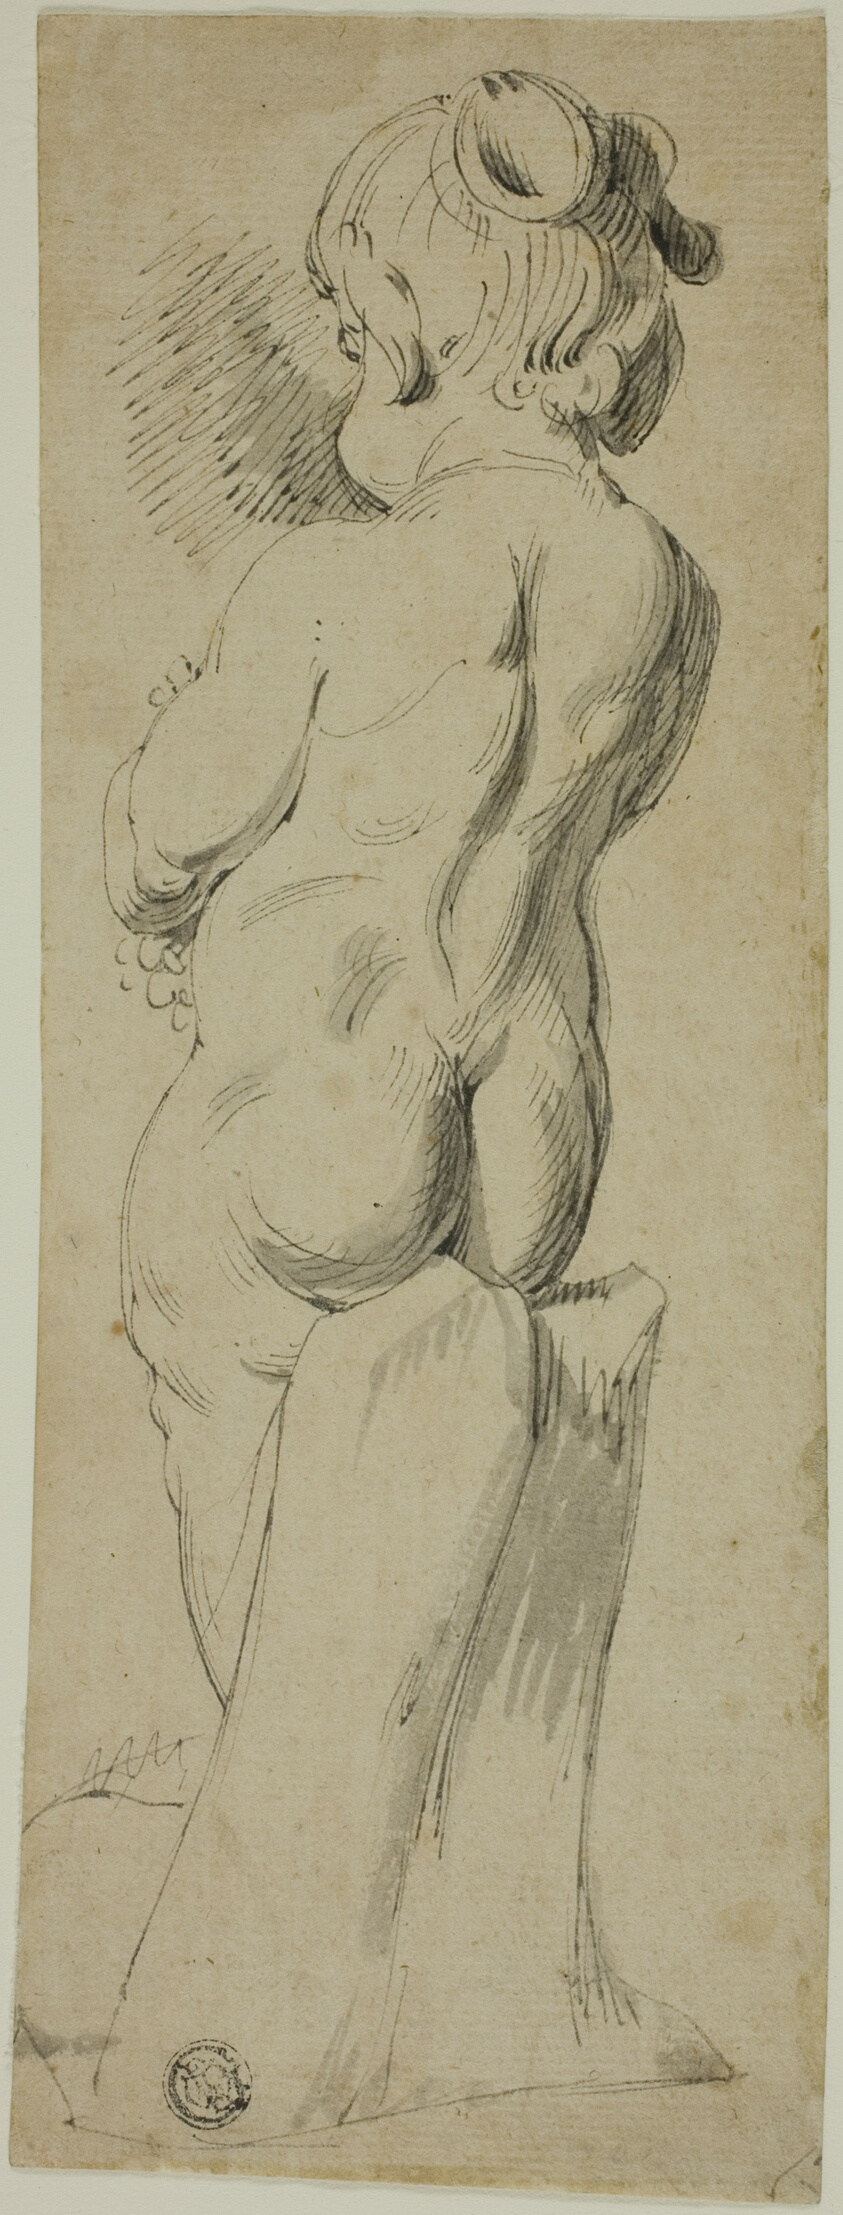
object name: Drawing and Watercolor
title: Standing Putto From the Back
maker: Style of Generic Parrocel; French, 18th century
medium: Pen and black ink, with brush and gray wash, on buff laid paper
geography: France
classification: pen and ink drawings; drawings (visual works); prints and drawing